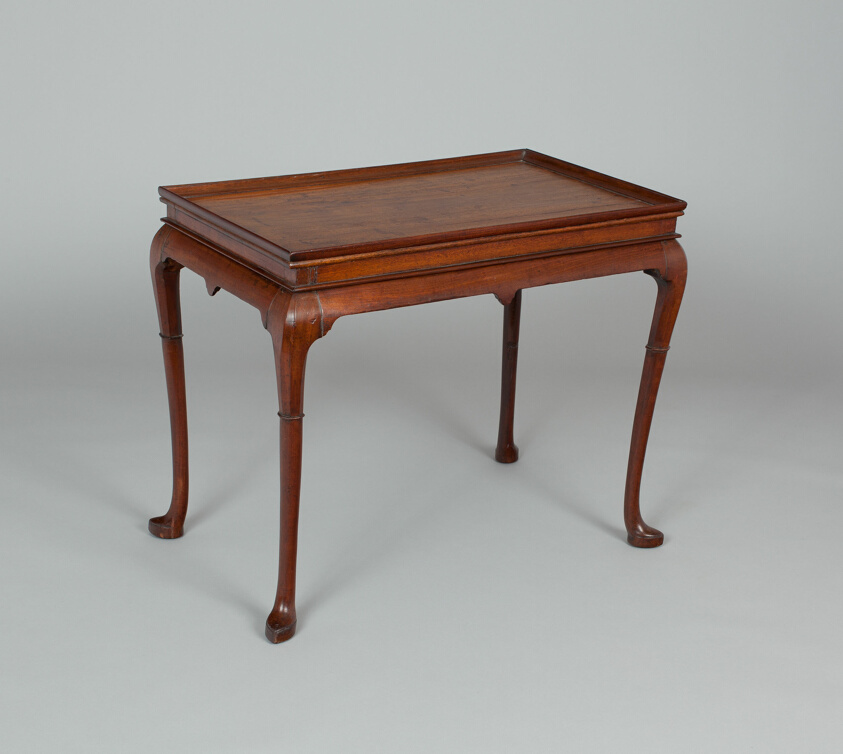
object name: Furniture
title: Tea Table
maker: Artist unknown (American, 18th century); Newport, Rhode Island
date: 1740–60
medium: Mahogany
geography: Newport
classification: table; furniture; american decorative arts; american arts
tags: furniture, dining, drinking